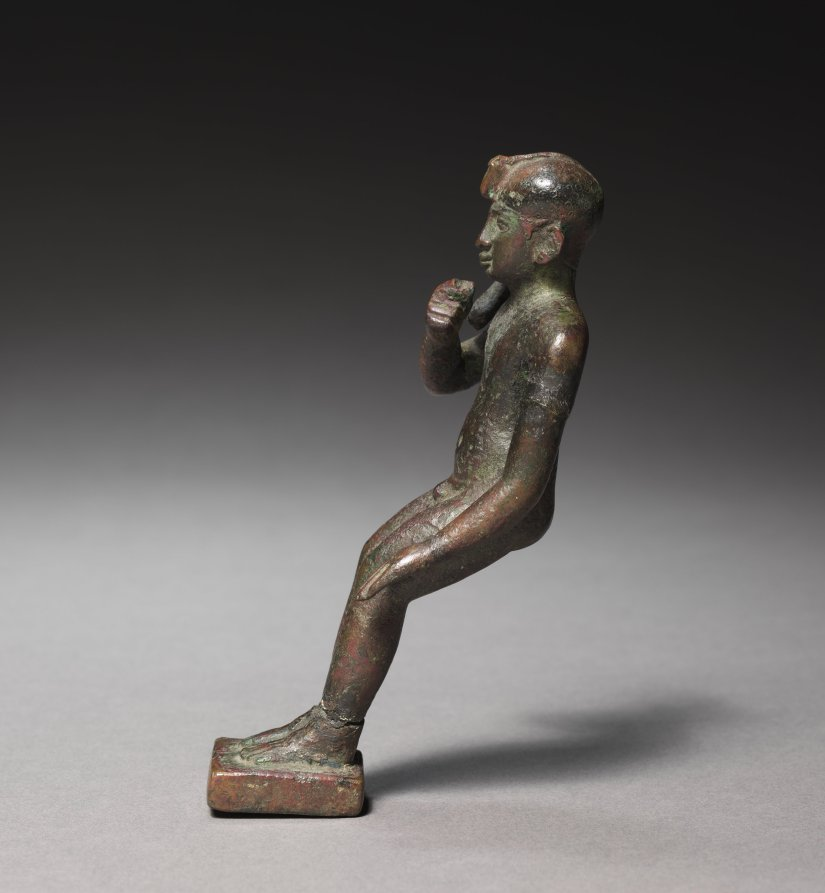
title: Statuette of Harpocrates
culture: Egypt, Greco-Roman period (332 BCE–395 CE), Ptolemaic dynasty (305–30 BCE)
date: 305–30 BCE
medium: bronze, solid cast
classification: Sculpture